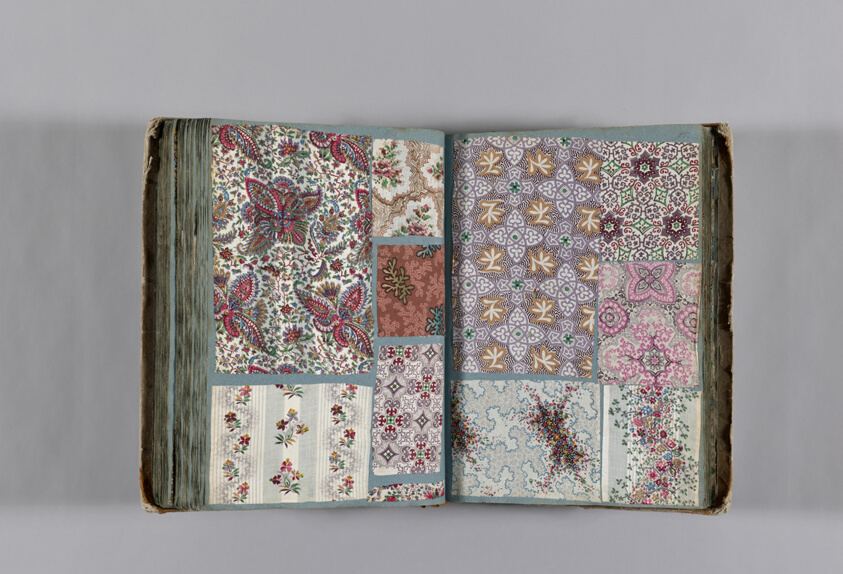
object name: Book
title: Sample book of swatches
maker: Mulhouse, France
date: 19th c.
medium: Sample book of swatches: cotton, plain weave, block printed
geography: France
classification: book; printed; weaving - printed